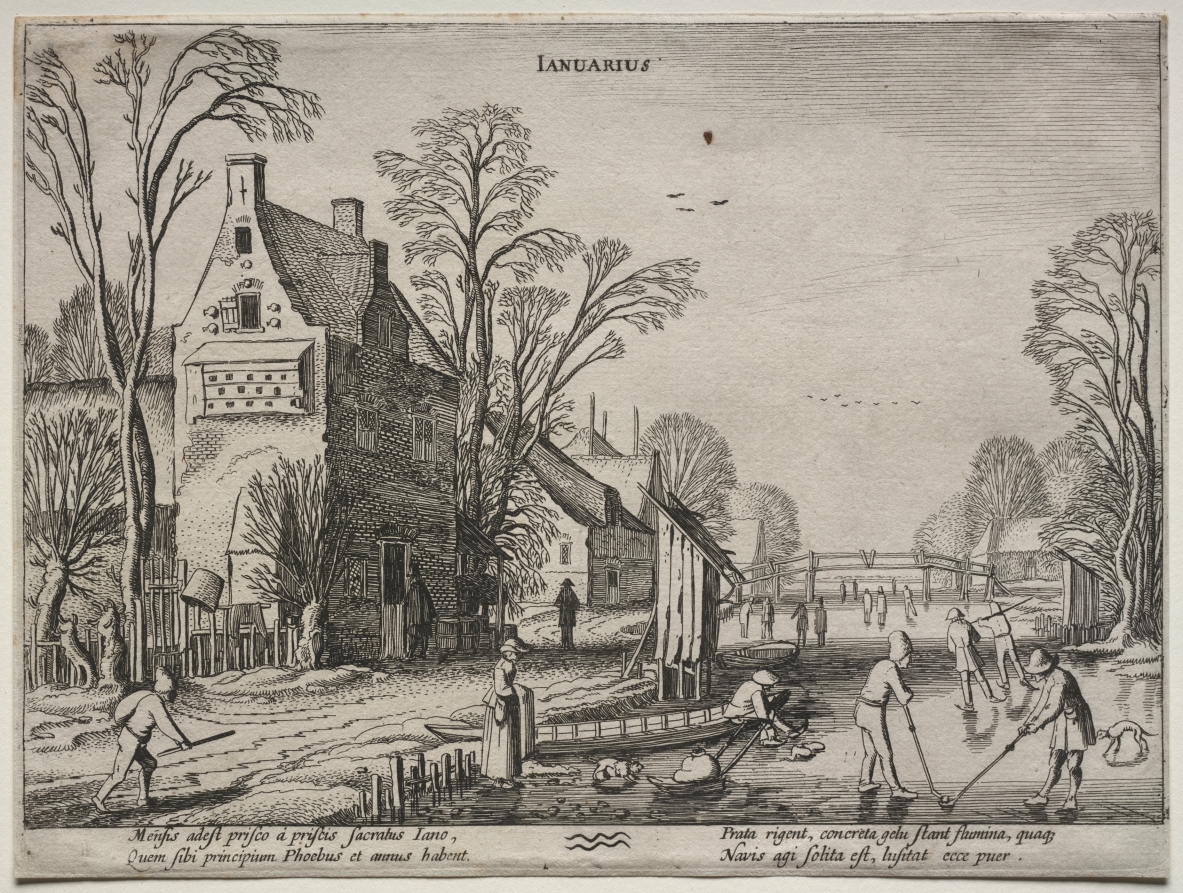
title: The Twelve Months: January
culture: Netherlands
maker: Jan van de Velde II (Dutch, 1593–1641)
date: 1608–18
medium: etching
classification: Print